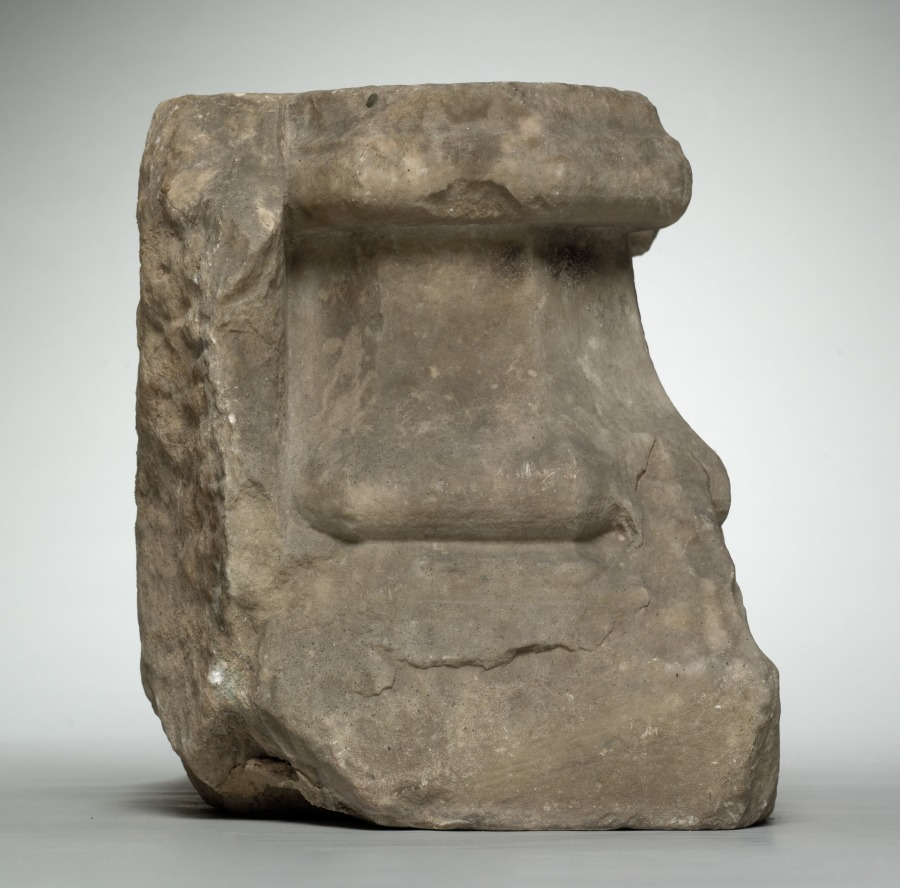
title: Double Column Base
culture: France, late 15th century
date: late 1400s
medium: marble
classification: Sculpture